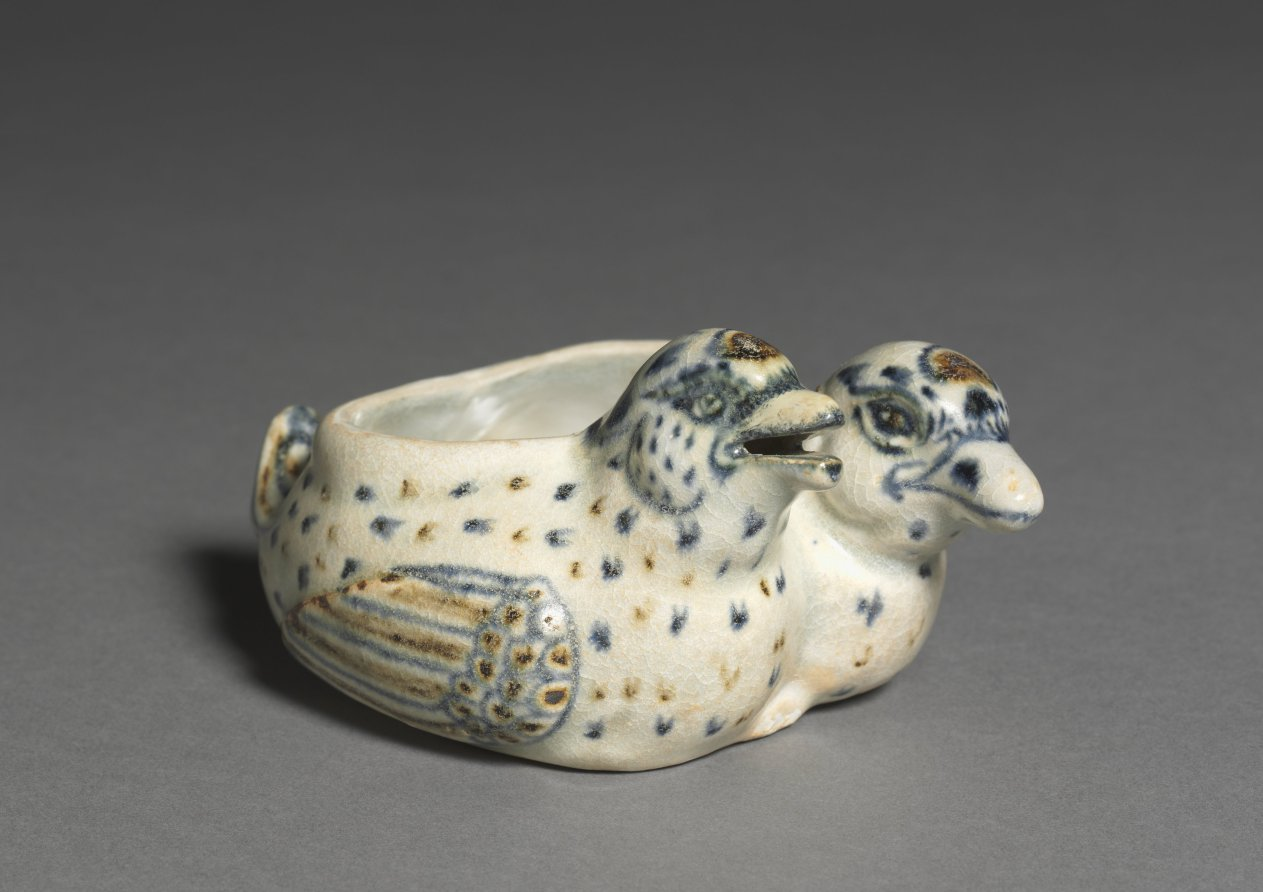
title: Double Ducks Jar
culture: Vietnam (Annam)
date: 1400s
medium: porcelain with underglaze blue and iron spots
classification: Ceramic